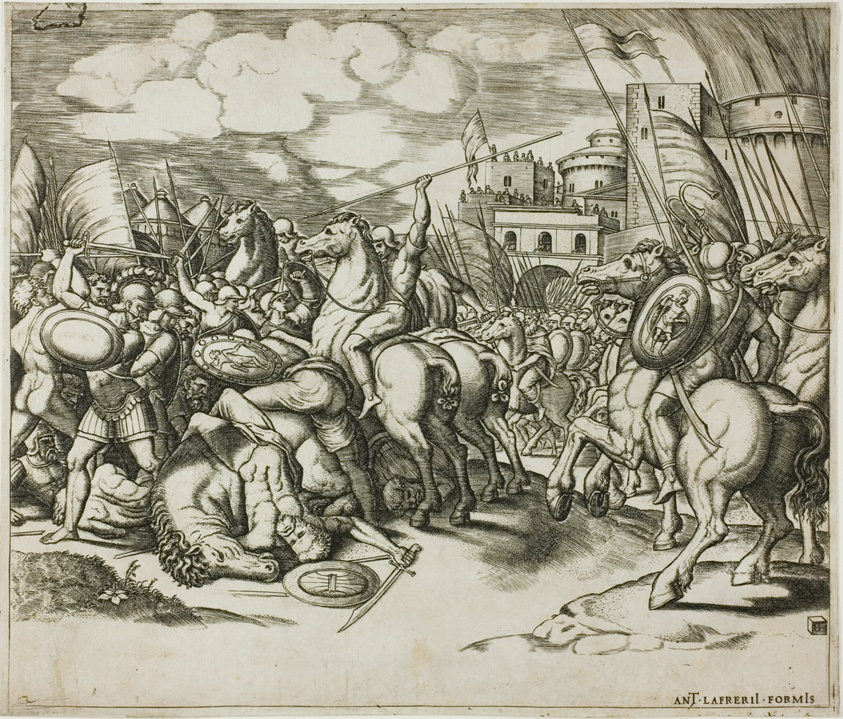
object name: Print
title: The Victory of Scipion over Syphax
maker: Master of the Die (Italian, active c. 1530–1560)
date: c. 1532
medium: Engraving on paper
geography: Italy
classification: engraving; print; prints and drawing